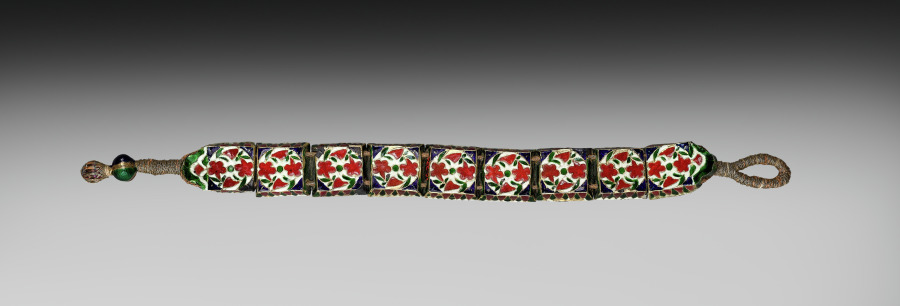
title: Armlet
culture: India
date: 1800s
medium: silver gilt with semiprecious stones and enamel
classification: Jewelry